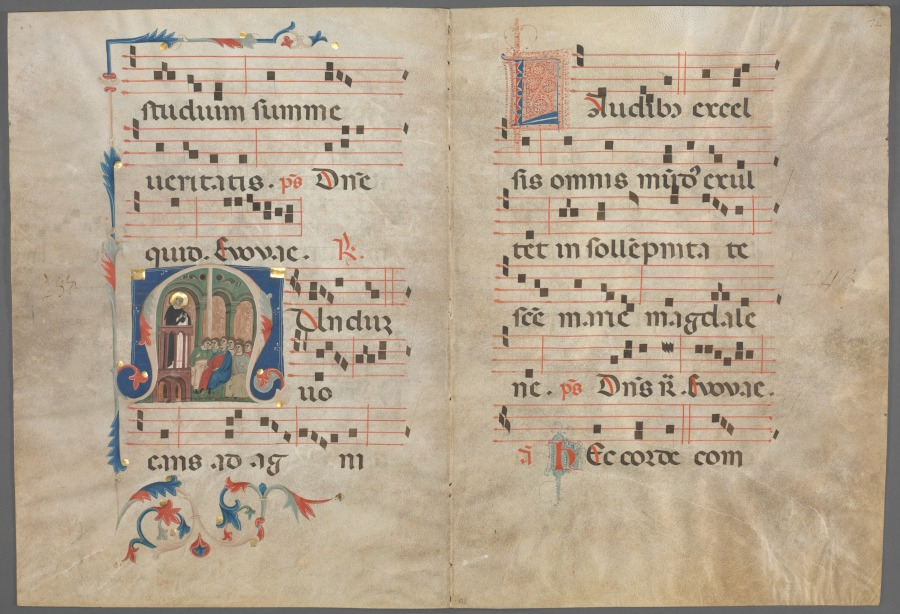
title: Bifolium from an Antiphonary: Initial M with Saint Dominic Preaching and Music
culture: Italy, Bologna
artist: Primo Miniatore di San Domenico (Italian)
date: c. 1320–40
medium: ink, tempera, and gold on parchment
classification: Manuscript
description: The representation of Saint Dominic (1170–1221), founder of the Dominican Order of Preachers, in this initial suggests that this double page was at one time part of a manuscript made for a Dominican convent. Saint Dominic traveled much, preaching throughout Europe, and was particularly venerated in Bologna, the city in which he died and was buried. The illuminator of this initial is named after a volume he decorated of Seneca’s works (now in the Bibliothèque nationale in Paris). His workshop specialized in large-scale manuscripts destined for wealthy religious institutions in the region of Emilia, for which Bologna was the artistic and intellectual center.